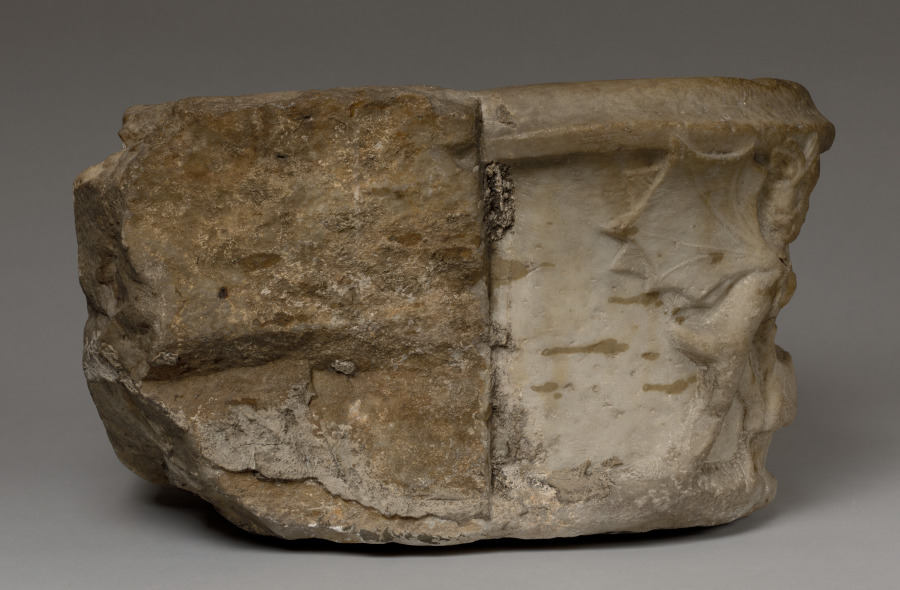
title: Holy Water Font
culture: Southern France, late 15th century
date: late 1400s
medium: marble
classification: Sculpture